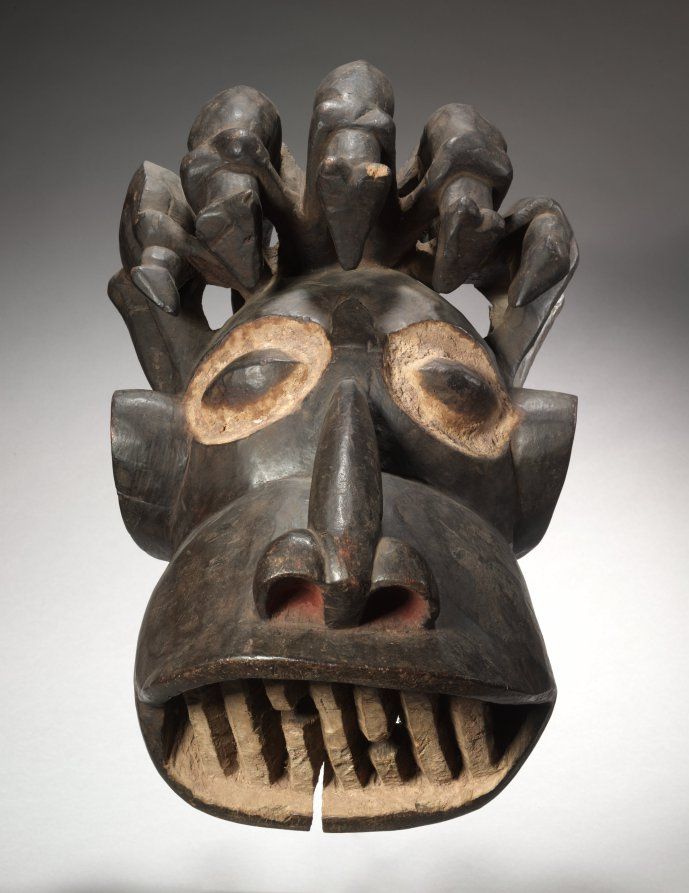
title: Helmet Mask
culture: Africa, Central Africa, Cameroon, possibly Kom-style maker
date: early 1900s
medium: Wood, paint, organic material, and iron alloy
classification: Mask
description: Deliberately distorted and exaggerated facial features reflect the awesome powers of a great chief. The quadrupeds on the mask’s head suggest the close association between the leopard and the king. In the Cameroon grasslands, masks are typically related to a regulatory society that guards ancestral mores; society members wear the masks and dance in the secrecy of the night.